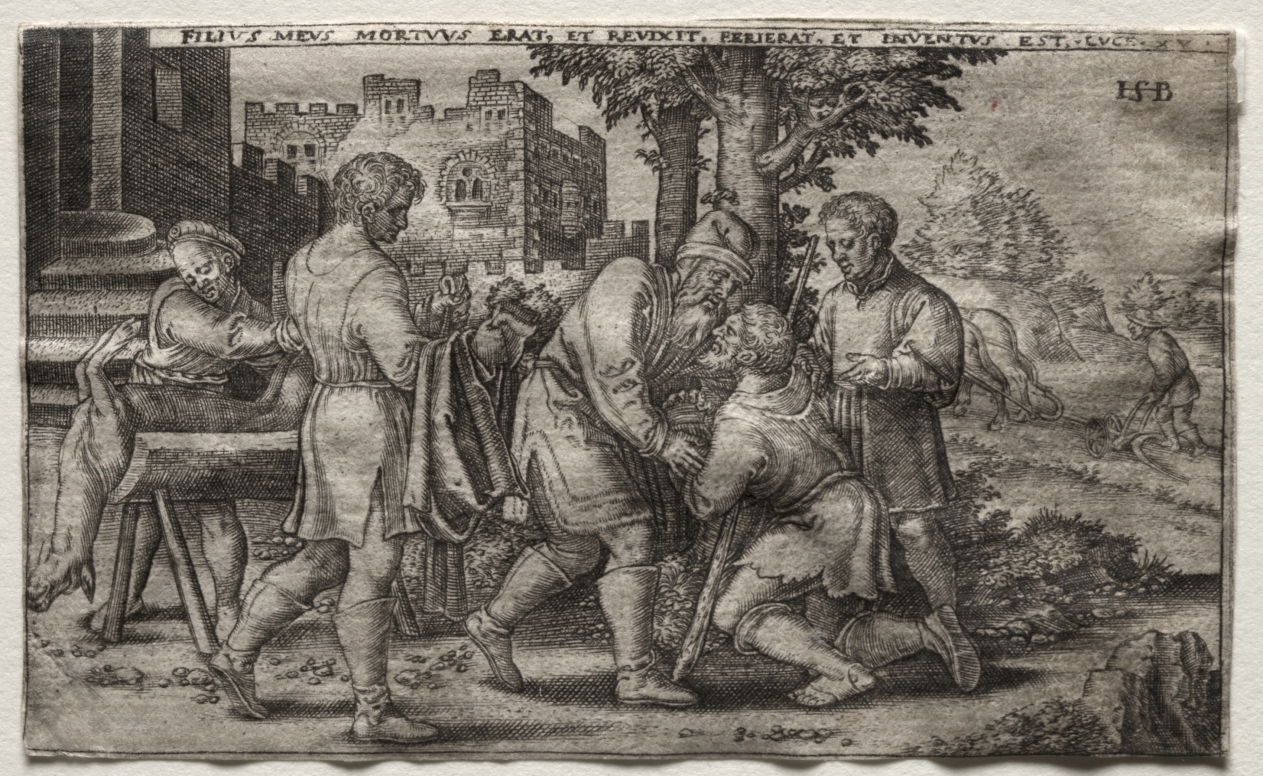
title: The Return of the Prodigal Son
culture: Germany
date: 1500s(?)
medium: engraving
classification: Print